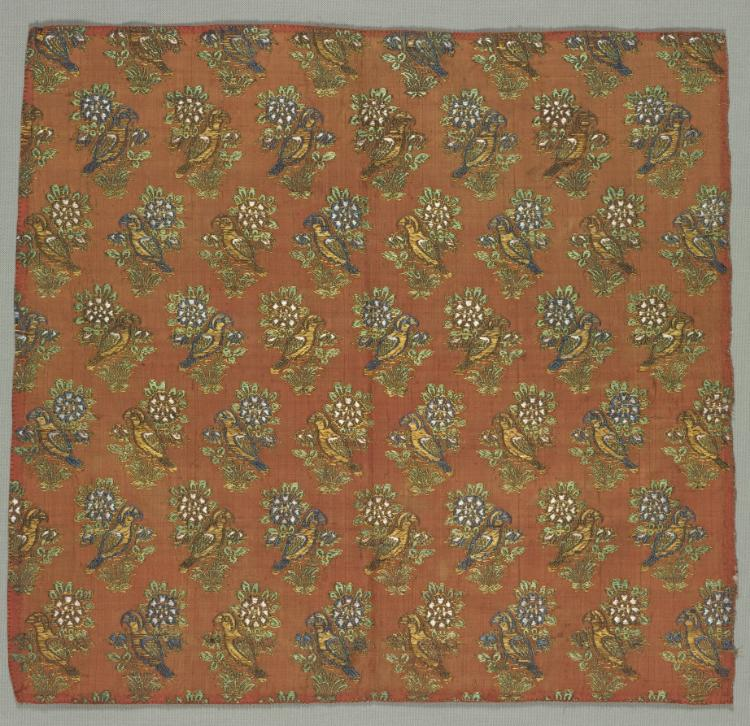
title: Fragment of Silk Taffeta with “Rose and Nightingale” Motif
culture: Iran, Safavid period (1501–1722)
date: 1700s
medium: Silk and metallic thread: taffeta, brocaded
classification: Textile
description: A luxurious textile like this would have been used for courtly robes or coats in Safavid Iran. The bird-and-flower motif is known as gul-u-bulbul in Persian, meaning “rose and nightingale.” The motif references the poetic image of a nightingale plaintively singing to an indifferent rose as a metaphor for unrequited human love as well as the soul’s desire for mystical union with the divine.